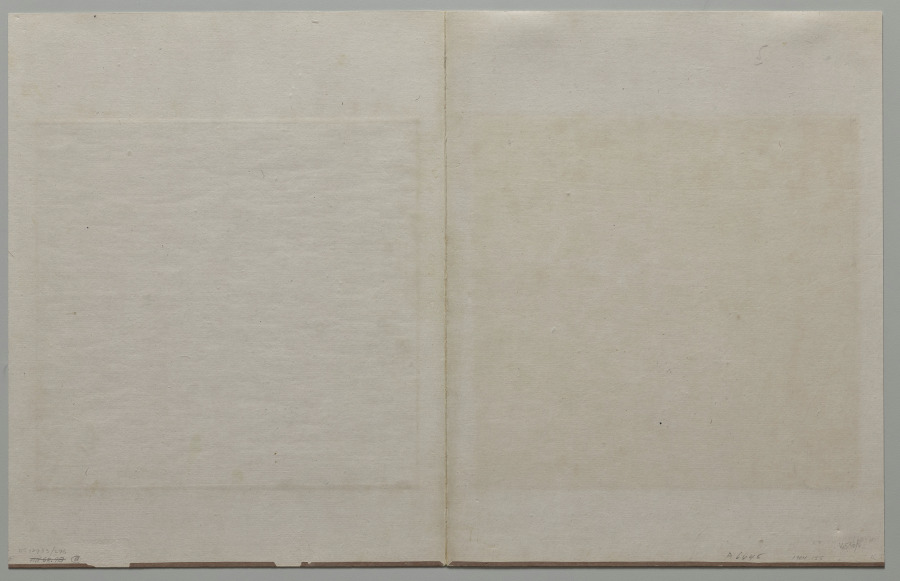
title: Birds on a Tree above a Cataract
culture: China, Southern Song dynasty (1127-1279)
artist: Li Di (Chinese, c. 1100-c. 1192)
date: 1127–1279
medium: Album leaf; ink and color on silk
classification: Painting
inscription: A signature at lower left edge.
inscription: 3 additional seals: 1 of Xiang Yuanbian 項元汴 (1525-1590), 2 of Wu Maohe 吳懋和 (1600s).